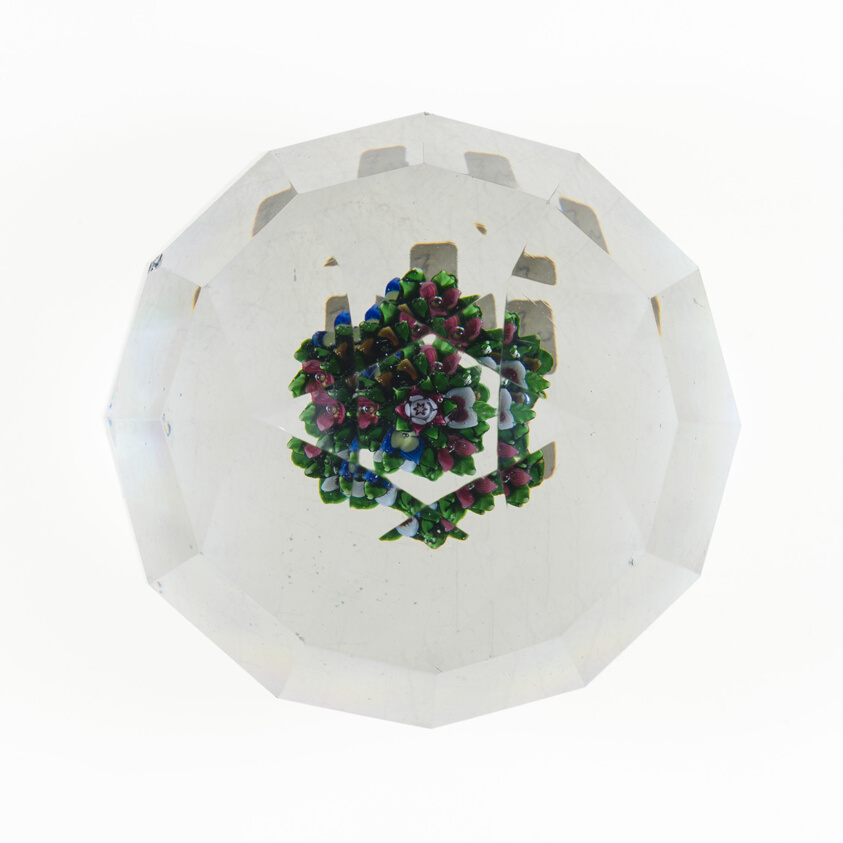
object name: Glass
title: Paperweight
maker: Saint-Louis Glassworks (Cristalleries de Saint-Louis); Lorraine, France, founded 1586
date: 19th century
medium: Glass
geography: Saint-Louis-lès-Bitche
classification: paperweight; glass